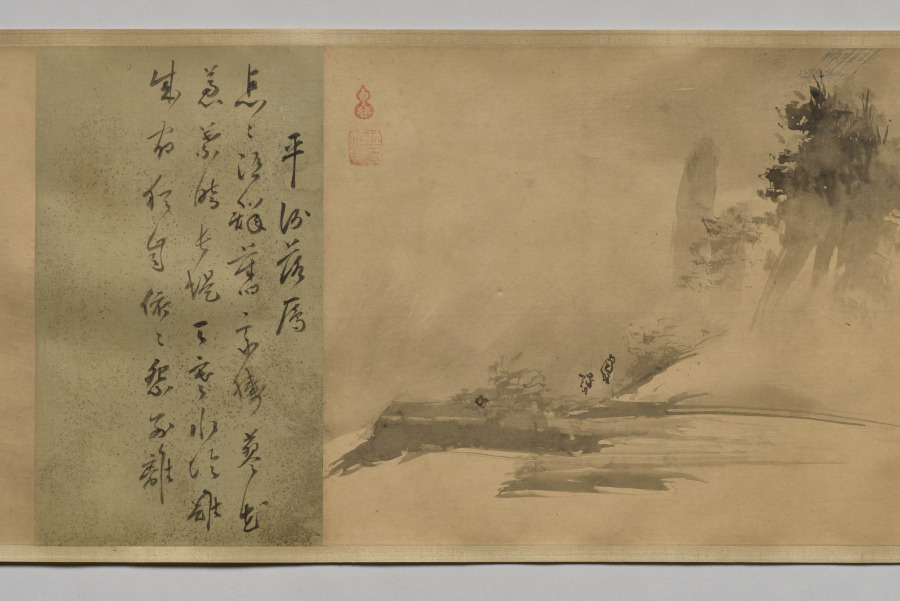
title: Poems and Pictures of the Eight Views of Xiao-Xiang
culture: Japan, Momoyama period (1573–1615)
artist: Unkoku Tōgan (Japanese, 1547–1618)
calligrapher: Inkei Gentetsu (Japanese, 1562–1612)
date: 1605–12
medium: Handscroll; ink on paper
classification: Painting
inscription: Each painting sealed with red gourd-shaped seal reading Unkoku (雲谷) and a square seal reading Tōgan (等顔).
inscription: Each painting prefaced with a titled poem on the Eight Views of Xiao-Xiang by Yujian Ruofen (active late 13th century) inscribed by Japanese Buddhist monk Inkei Gentetsu (1562–1612).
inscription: 右寫玉㵎之筆勢／雪舟末葉等顔筆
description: Unkoku Tōgan brushed these scenes using the splashed-ink technique associated in Japan with the Chinese monk Yujian Ruofen (active late 1200s). Xiao-Xiang refers to the region in present-day Hunan province, where the Xiang River and its tributaries converge. Each of the eight views evokes a time of day or season. The earliest surviving series of Xiao-Xiang paintings is by Wang Hong (active mid-1100s), but textual evidence tells us the theme appears earlier. It was later adopted in Japan and Korea, as seen here. The poems were inscribed by Inkei Gentetsu, the third abbot of the Rinzai Zen temple Tōshunji, Japan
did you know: The “Tō” of Tōgan comes from the name of painter Sesshū Tōyō (1420–1506).